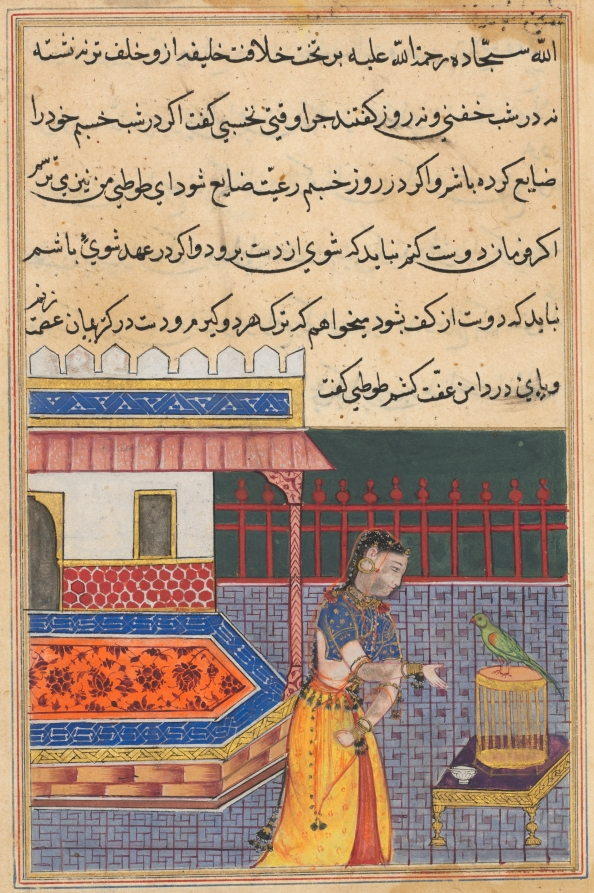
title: The parrot addresses Khujasta at the beginning of the forty-first night, from a Tuti-nama (Tales of a Parrot): Forty-first Night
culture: Mughal India, court of Akbar (reigned 1556–1605)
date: c. 1560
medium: gum tempera, ink, and gold on paper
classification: Painting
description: On the forty-first of fifty-two nights, Khujasta consults Tuti the parrot for advice on how to balance her lover’s wishes with her vow of marriage. Tuti, perched atop his cage, responds by telling her a story about a donkey who was punished for singing too brazenly.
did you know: Khujasta has braided jasmine flowers into her hair.